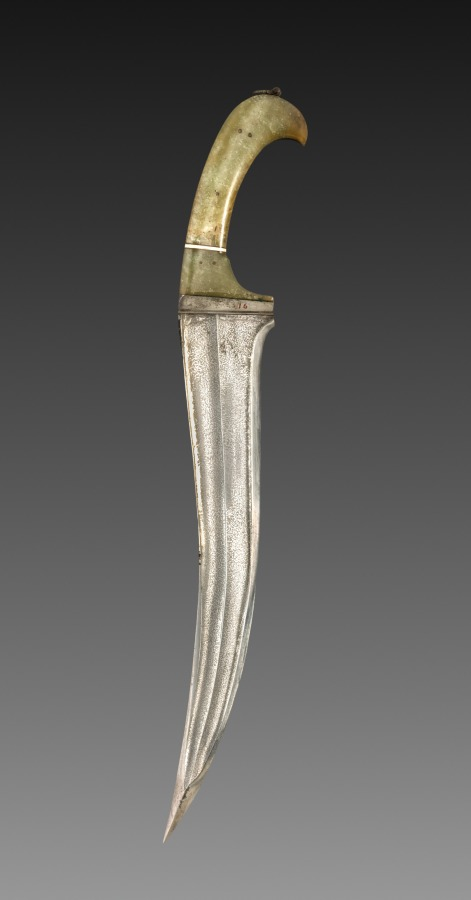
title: Knife with Jade Handle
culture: East India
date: c. 1750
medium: steel and jade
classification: Arms and Armor